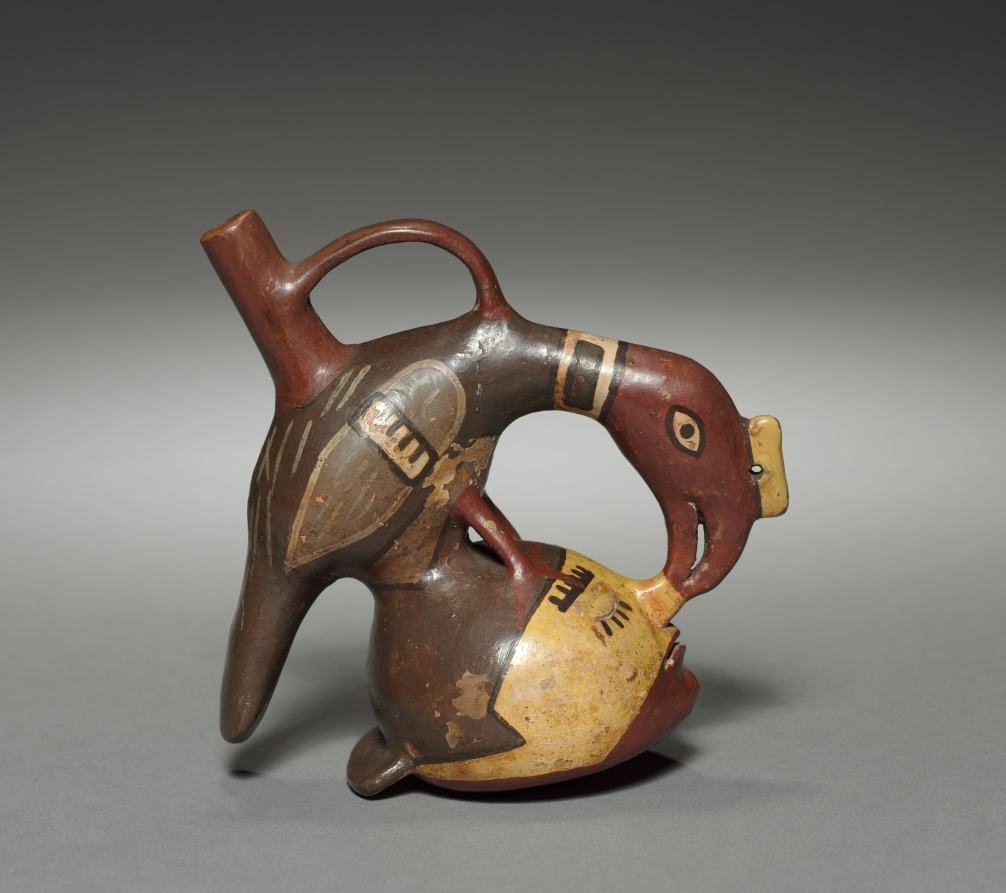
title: Vessel with Condor and Human Head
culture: Peru, Tiwanaku style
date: 400–1000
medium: pottery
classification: Ceramic